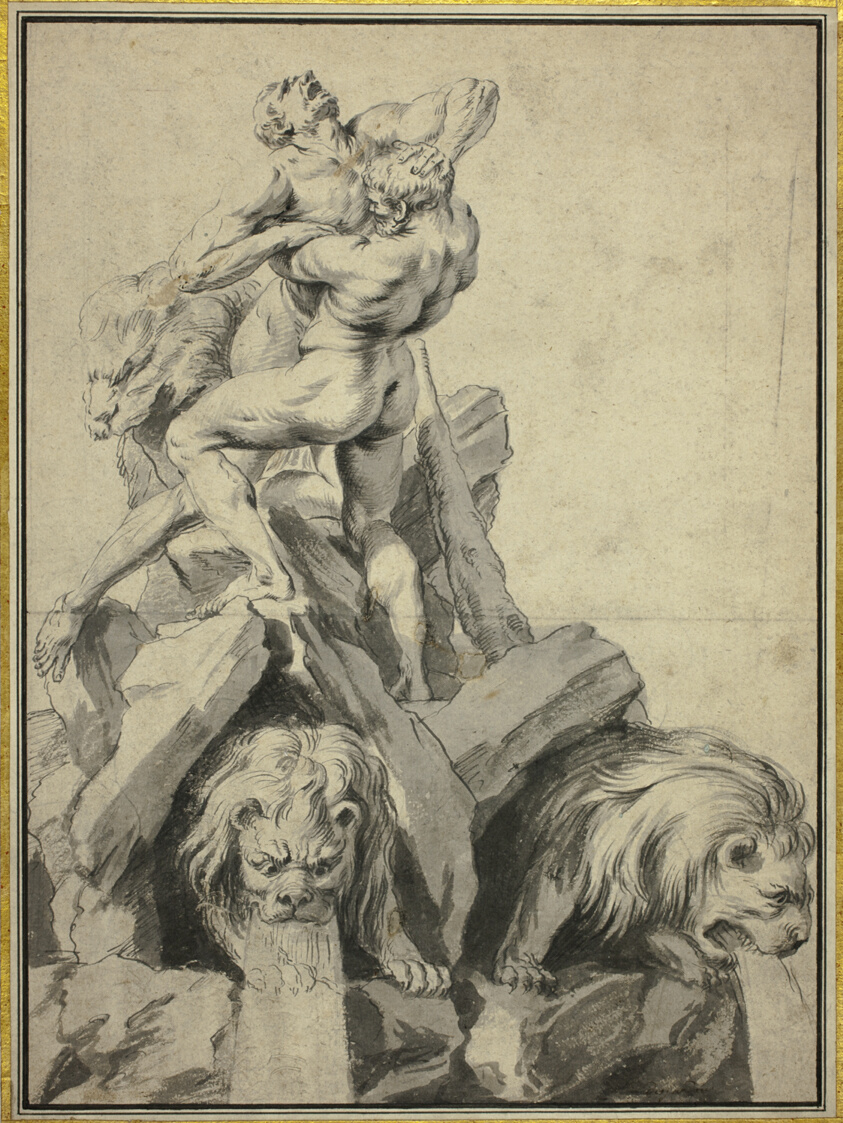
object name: Drawing and Watercolor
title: Hercules and Antaeus Design for a Fountain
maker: Attributed to Martin Desjardins (Dutch, 1639/40-1694); or Jacques Desjardins (Dutch, 1671-c. 1716)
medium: Pen and black ink and brush and gray wash on cream wove paper, laid down on ivory laid paper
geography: Netherlands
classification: pen and ink drawings; drawings (visual works); prints and drawing